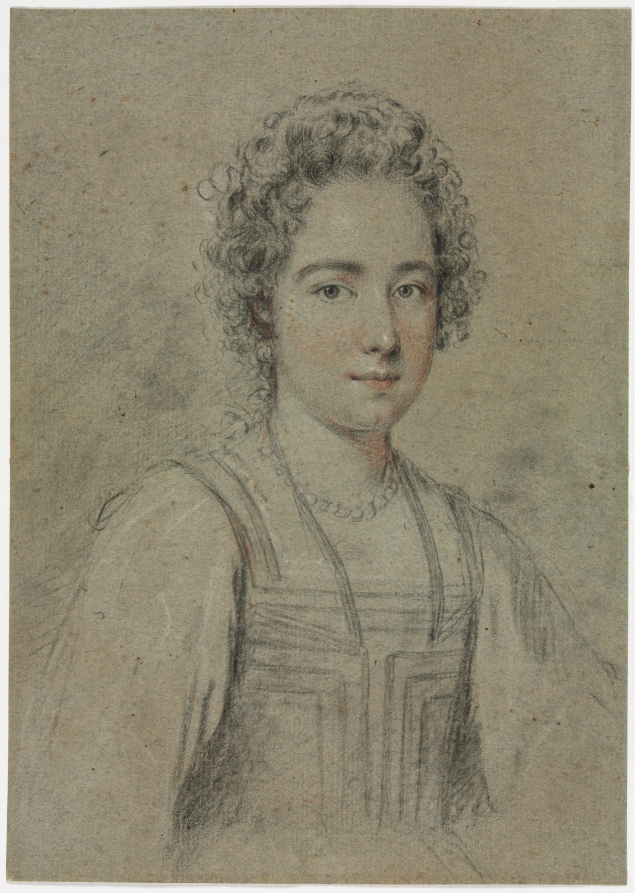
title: Portrait of a Young Woman with Pearls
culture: Italy, 17th century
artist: Ottavio Mario Leoni (Italian, 1578–1630)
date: c. 1600–1615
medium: black chalk with red chalk, heightened with white chalk (stumped in places)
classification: Drawing